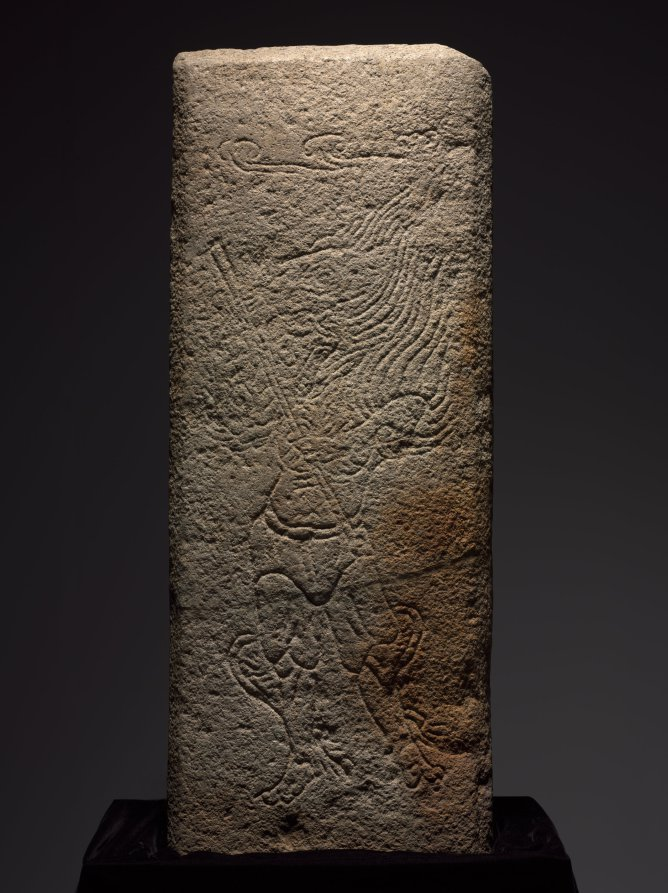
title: Stone Panel for Royal Tomb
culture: Korea, Unified Silla period (676-935)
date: late 700s-early 800s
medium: granite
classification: Sculpture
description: This panel shows a figure with a human body and the features of a rat, which is one of the signs of the Asian zodiac, and is likely one of 12 granite panels from a royal tomb. It is probably from Gyeongju—the capital of the kingdoms of the Silla (57 BCE–668) and Unified Silla (688–935) periods—where large royal tomb mounds can still be found. This panel resembles those showing the animal signs of the Korean zodiac from the tomb of General Kim Yusin (595–673) in Gyeongju, the most famous tomb of the period.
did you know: A rat, one of the signs of the East Asian zodiac, carved in this stone panel symbolizes wealth.